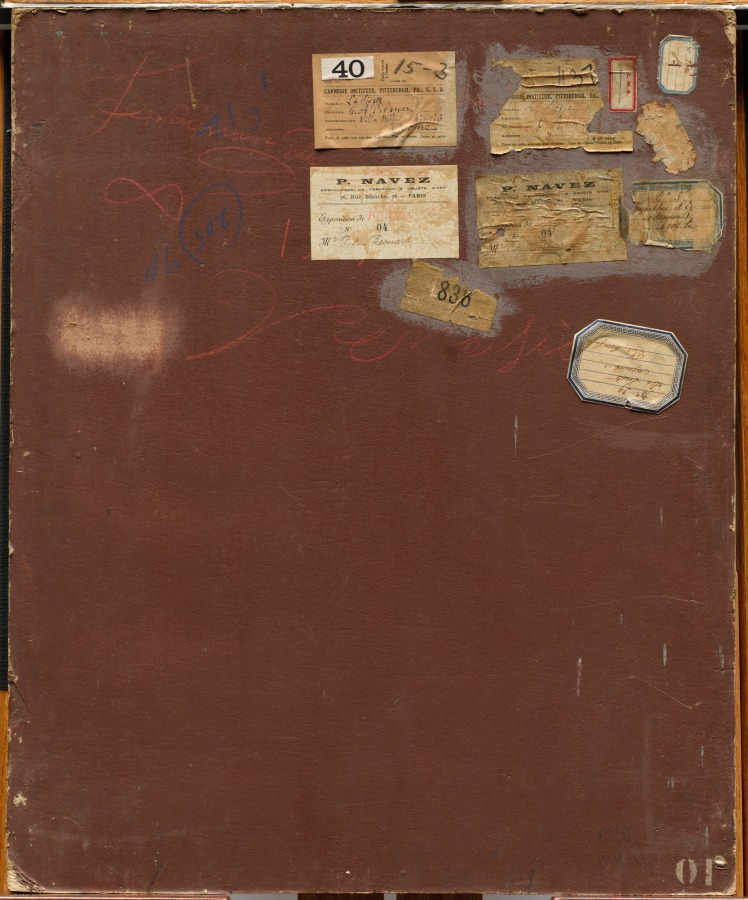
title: The Siesta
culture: France, 19th century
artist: Albert Besnard (French, 1849–1934)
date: c. 1890 – 1920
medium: oil on board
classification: Painting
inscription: Signed lower left: ABesnard [AB in monogram]